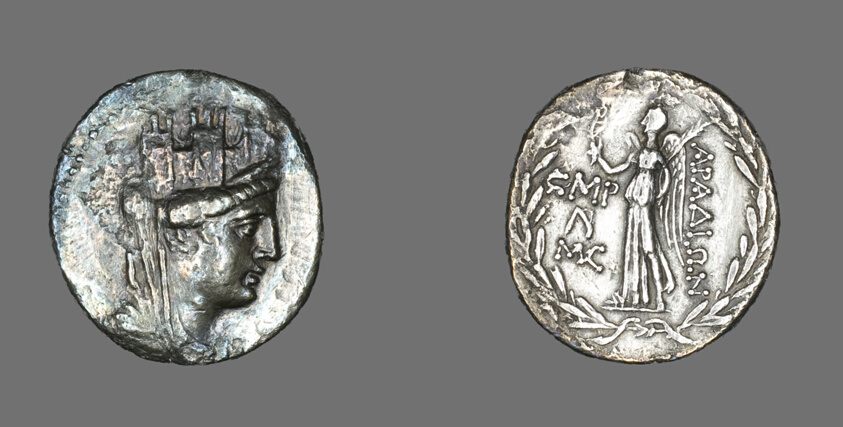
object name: Coin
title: Tetradrachm (Coin) Depicting the Goddess Tyche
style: roman (ancient, style or period), ancient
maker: Roman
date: 114-113 BCE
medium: Silver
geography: Roman Empire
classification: coin; ancient art